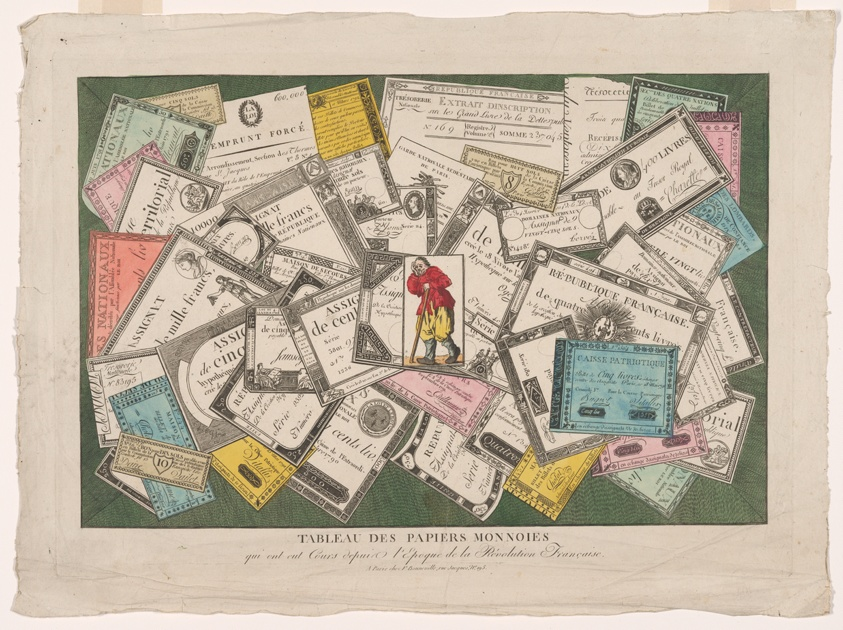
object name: Print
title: Picture of Revolutionary Assignats (Tableau des papiers monnoies qui ont eut cours depuis l'epoque de la Révolution française)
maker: Unknown Artist (French, 18th century); published by François Bonneville (French, active 1793–1802)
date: 1797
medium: Hand colored engraving and etching in black on cream laid paper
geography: France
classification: prints and drawing; paper; etching; engraving; print